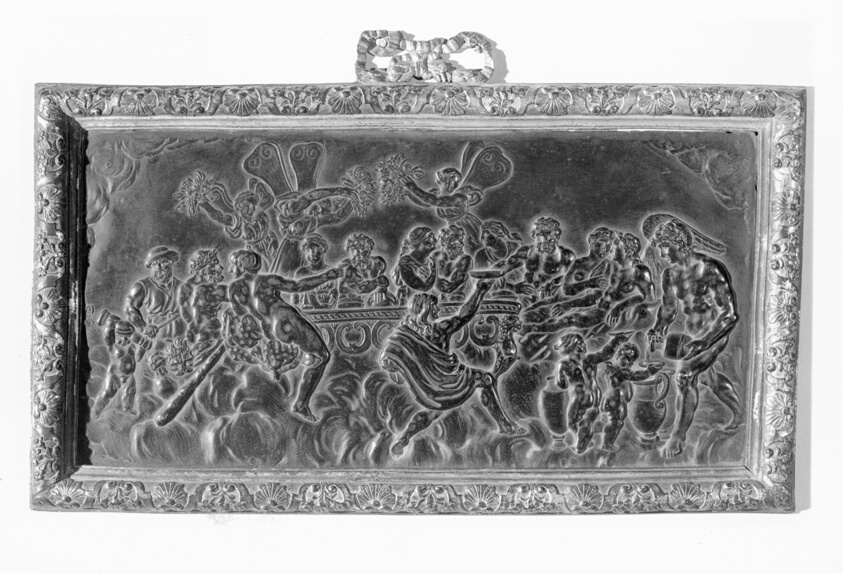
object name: Sculpture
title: Mythological Banquet Scene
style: 17th Century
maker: French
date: c. 1680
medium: Bronze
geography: France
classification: relief; bronze; french; metal; sculpture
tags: banquet, angels, child, feast, food, men, mythical, mythological figures, mythology, nudes, table, vase, women